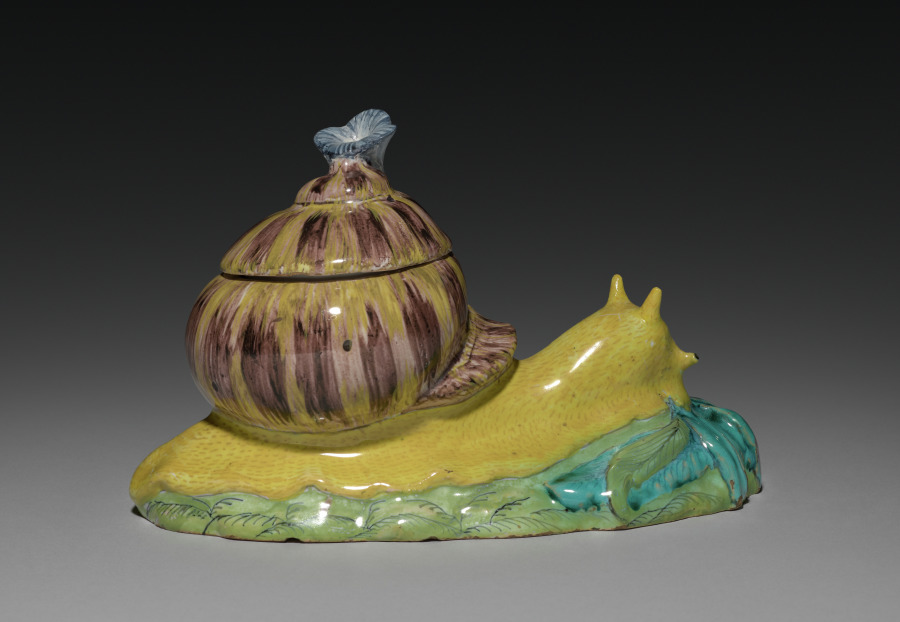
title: Covered Box in the Form of a Snail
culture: France, 18th century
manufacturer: Strasbourg Factory (France)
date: c. 1750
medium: faience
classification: Ceramic